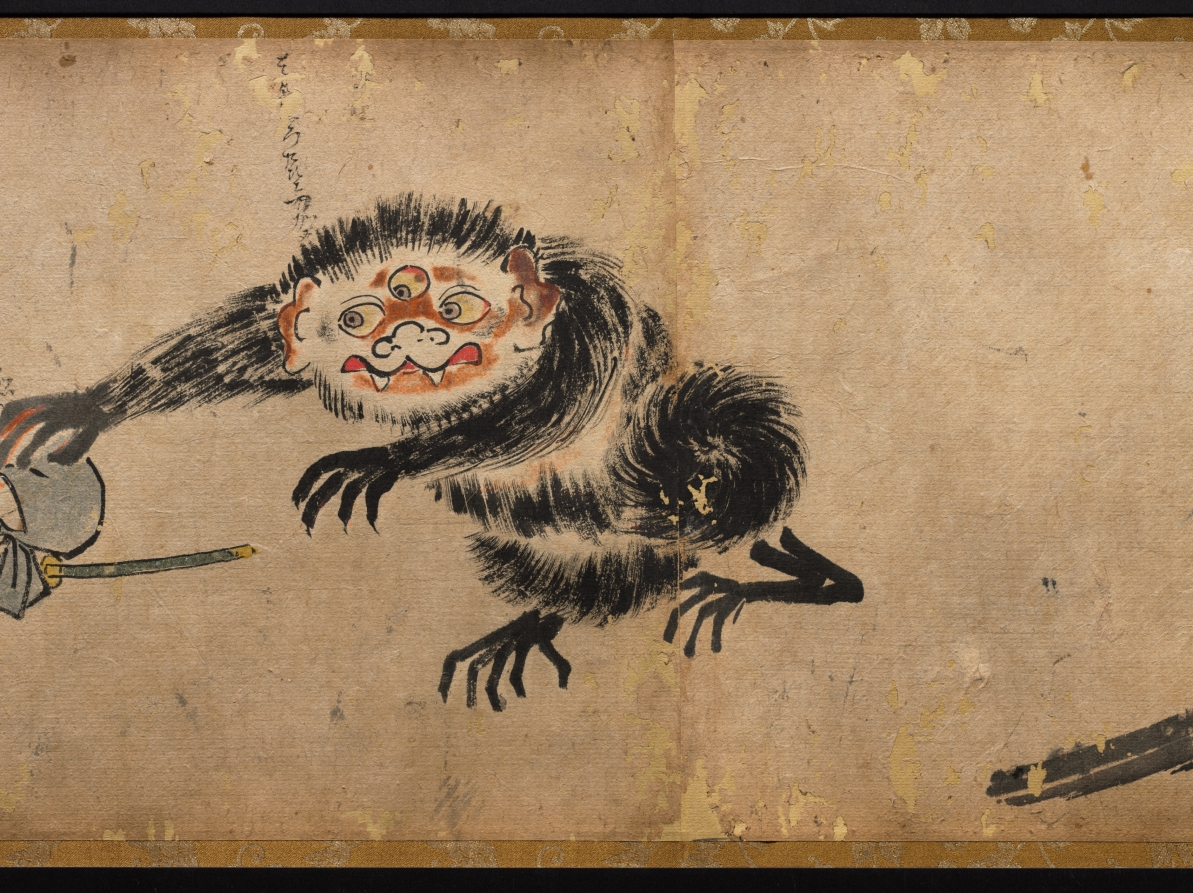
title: The Illustrated Tale of Oishi Hyōroku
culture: Japan, Edo period (1615–1868)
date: 1700s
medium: handscroll; ink and color on paper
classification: Painting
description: This incomplete handscroll illustrates part of the story of Oishi Hyoroku, a young man tasked with battling fox apparitions who were creating problems in his town. In other extant versions of the scroll, the story is set in the fall of 1624 in Kagoshima in southern Japan. Throughout the story, Hyoroku is tricked and terrified by the foxes that shift their shapes into a variety of monstrous phantoms. After repeated humiliations, he eventually captures two of the foxes. In this version, colloquial texts that function like text blurbs in comics appear throughout the scroll, but the main text is missing.